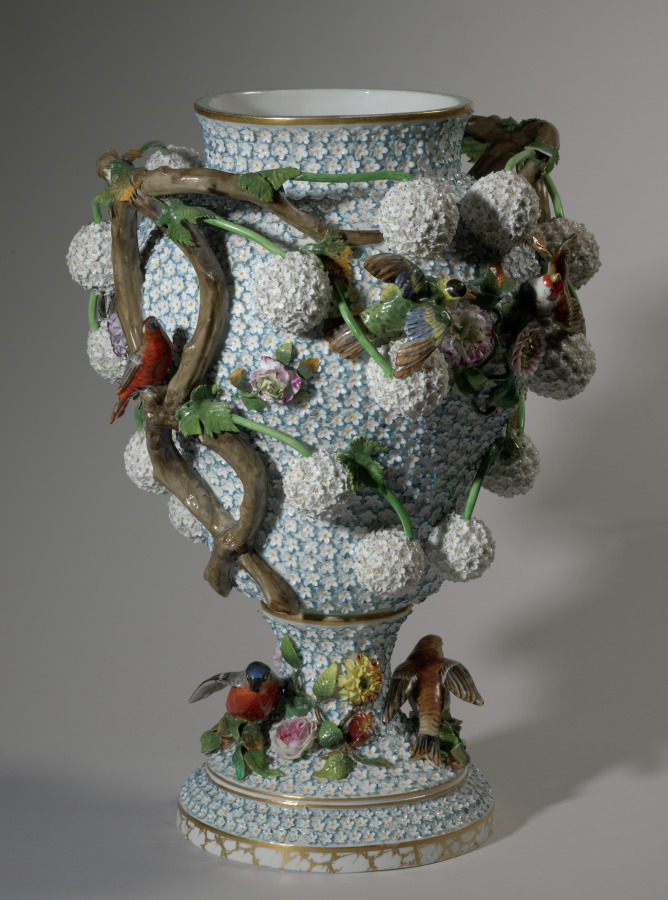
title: Vase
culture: Germany, 19th century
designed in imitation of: Meissen Porcelain Factory (German, est. c. 1710)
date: 1850–1899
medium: porcelain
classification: Ceramic